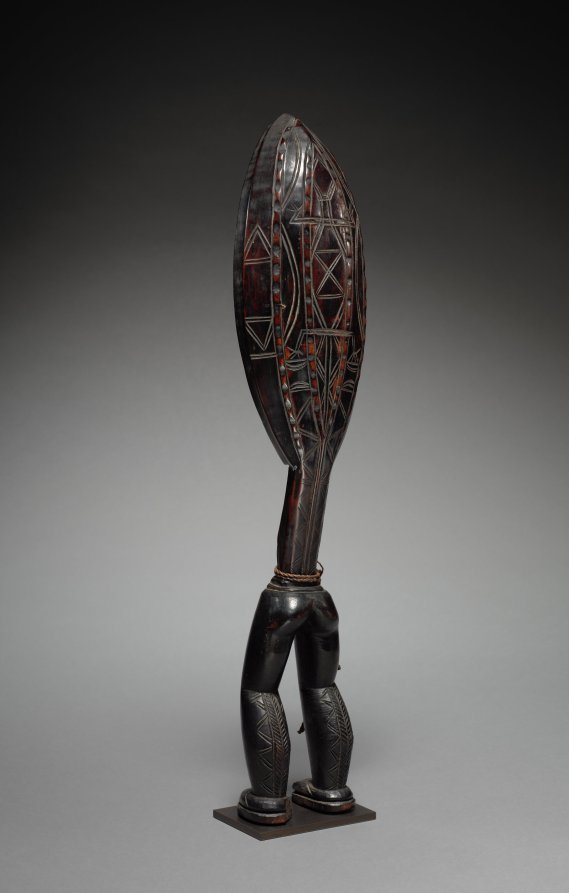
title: Ceremonial Ladle (Wunkirmian or Wakemia)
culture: Africa, West Africa, Côte d'Ivoire, Dan-style carver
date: possibly late 1800s or early 1900s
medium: Wood, twine, and possibly resin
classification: Sculpture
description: An emblem of great prestige, this human-shaped ladle would have been owned by a distinguished married woman recognized for her talents as a farmer and her exceptional generosity and hospitality. One of her responsibilities was to host a grand Feast of Merit when she, along with other highly respected women, prepared food for a large number of local and foreign guests. During the feast the women danced brandishing their rice-filled ladles while singing in strident voices.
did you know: This ladle was a status symbol for a notable woman.